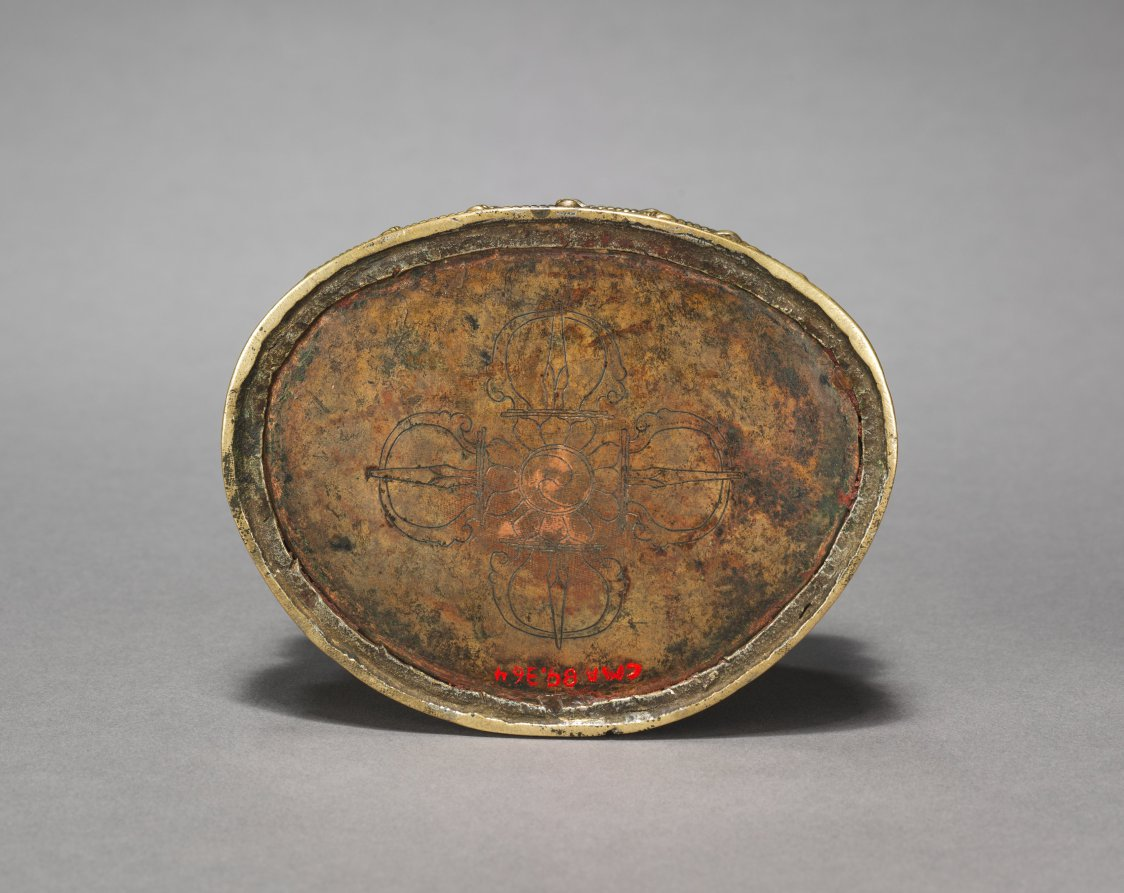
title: Seated Maitreya Buddha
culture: Western Tibet, Yongle Period (1403-1424)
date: c. 1400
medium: bronze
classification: Sculpture